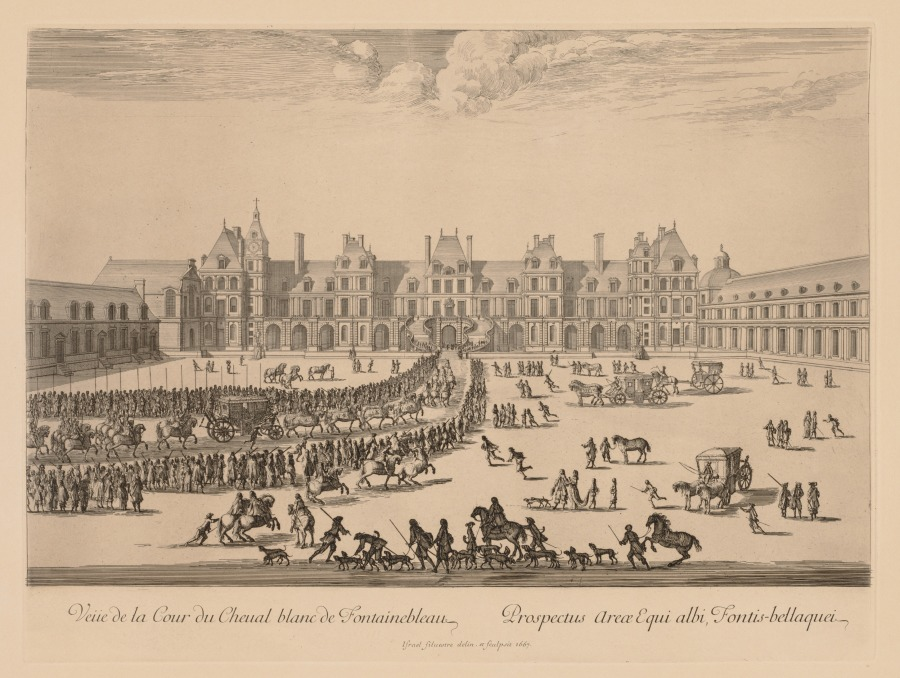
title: Vue de la Cour du Cheval-Blanc de Fontainebleau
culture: France, 17th century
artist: Israël Silvestre (French, 1621–1691)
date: 1667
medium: engraving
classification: Print